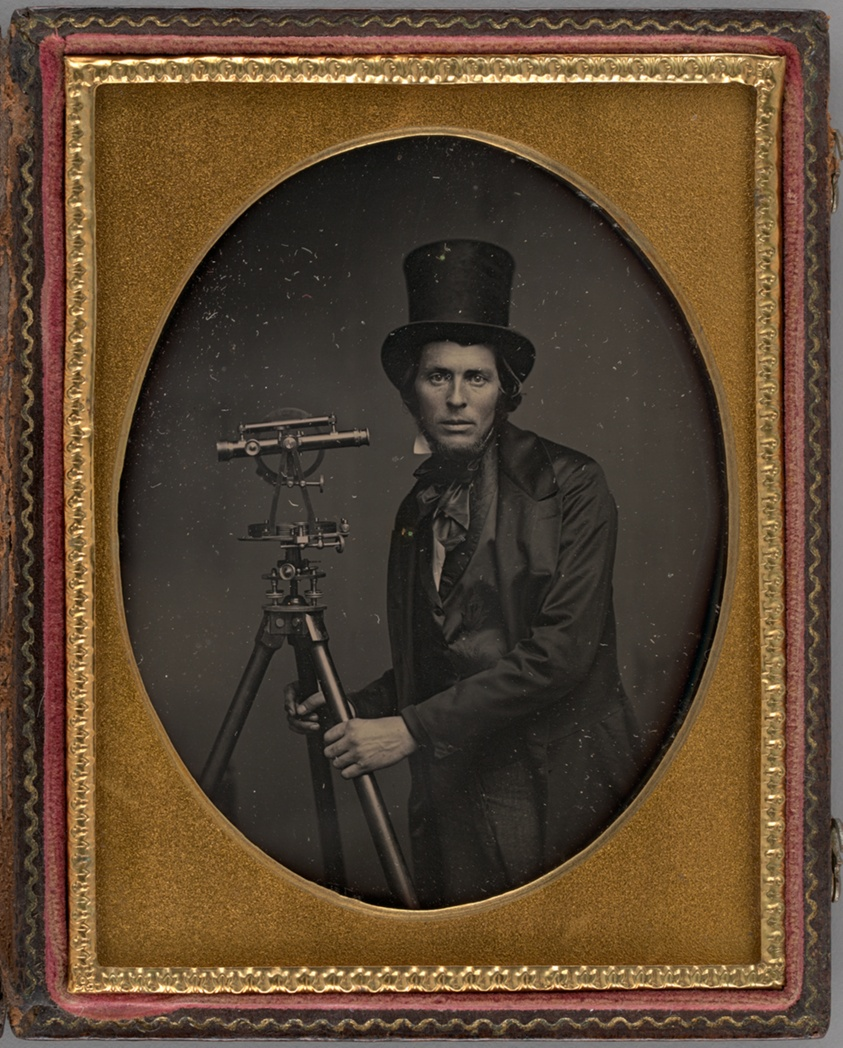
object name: Photograph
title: Untitled (Surveyor)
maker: Unknown maker; American, 19th century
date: 1854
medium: Daguerreotype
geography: United States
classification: portrait; daguerreotype; portrait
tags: lundberg collection, Male, portraits, portraits: male subject